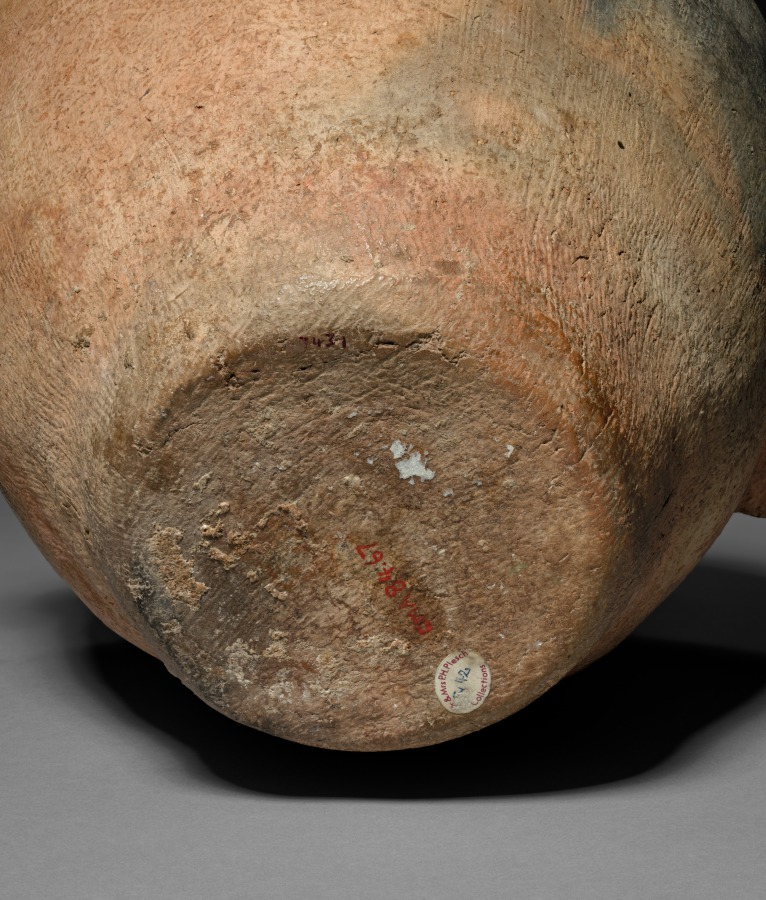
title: Urn with Lug Handles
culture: China, Gansu province, Xindian Culture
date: c. 1300–1000 BCE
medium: earthenware with slip coating and painted decoration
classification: Ceramic